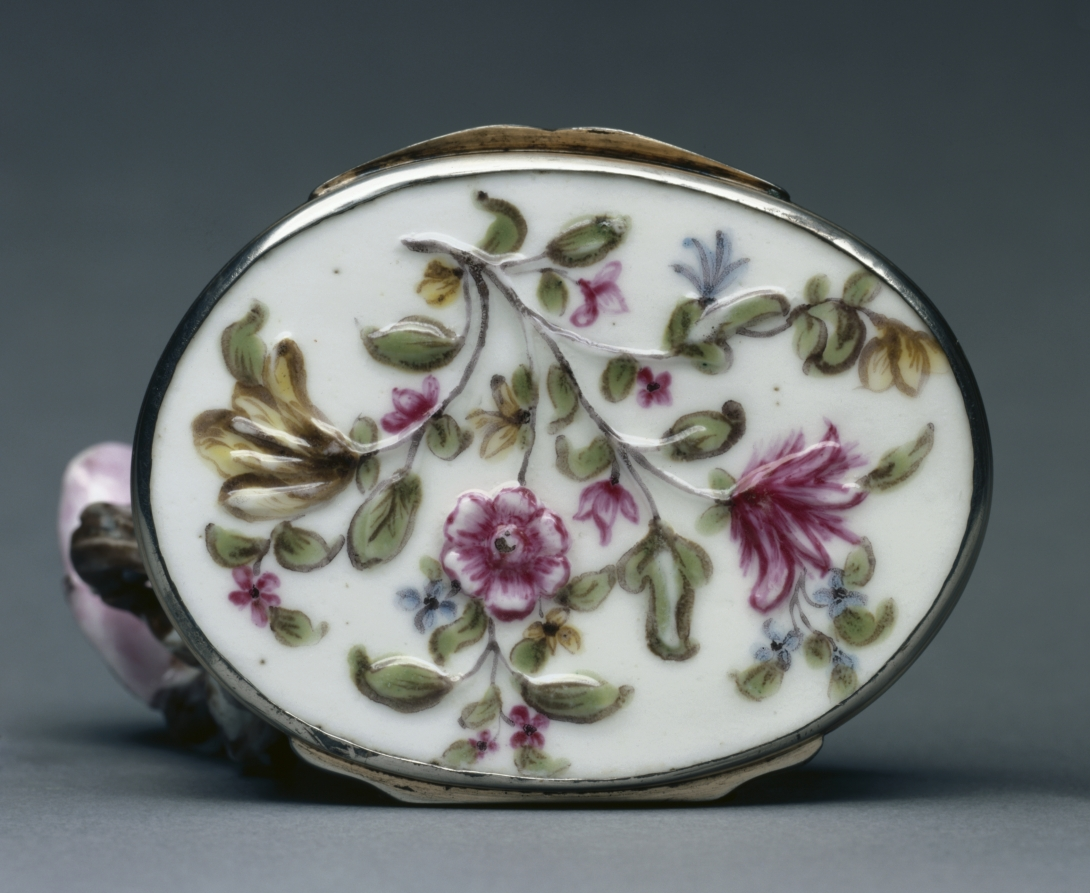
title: Box with Reclining Huntress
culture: France, Mennecy, 18th century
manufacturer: Mennecy Factory (French)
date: c. 1753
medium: soft-paste porcelain mounted in silver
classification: Ceramic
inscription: porcelain unmarked